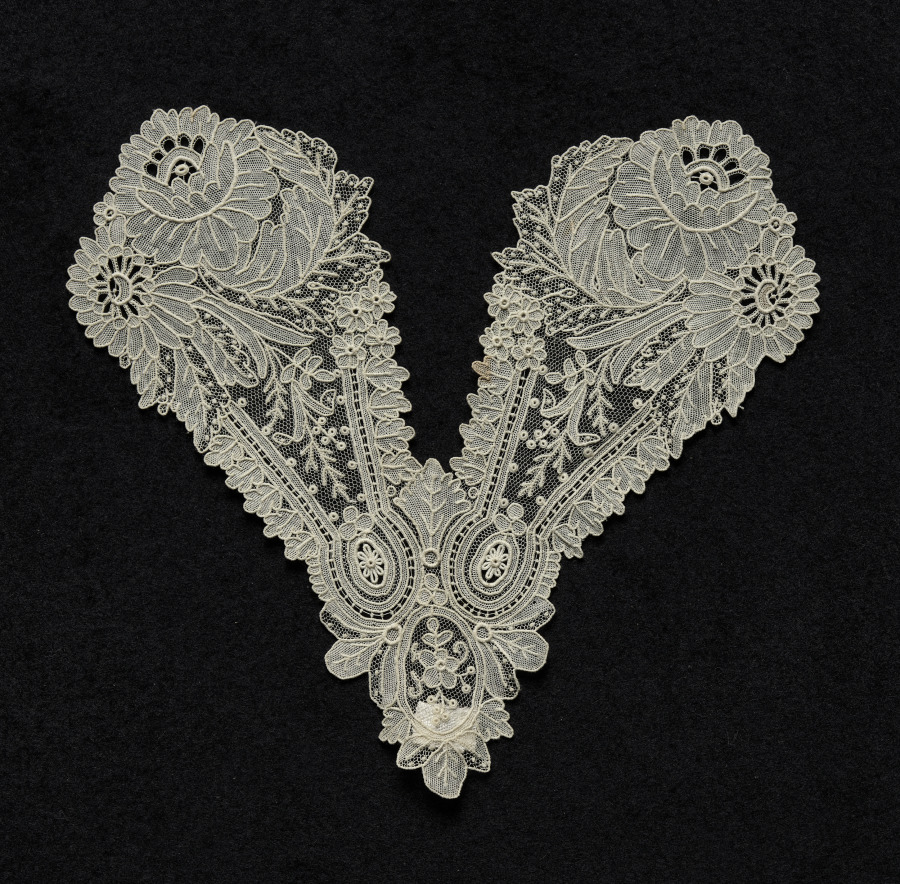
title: Lace Jabot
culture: Belgium, Brussels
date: 1800s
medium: Linen: needle lace (point de gaze)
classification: Lace